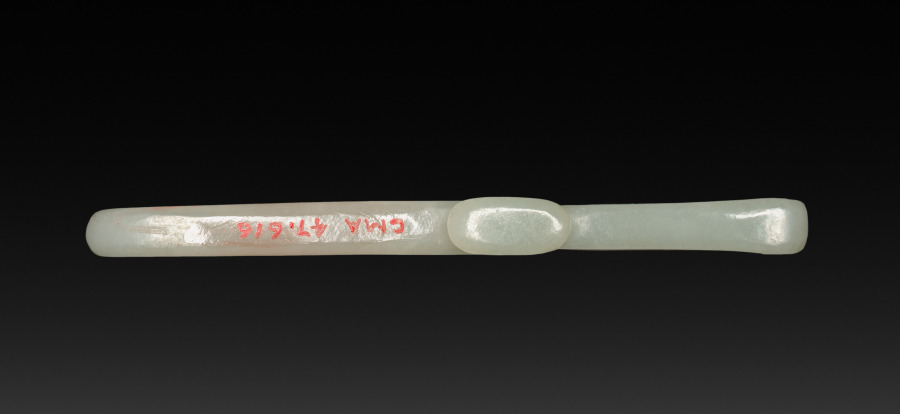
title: Buckle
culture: China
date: 1900s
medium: jade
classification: Jewelry